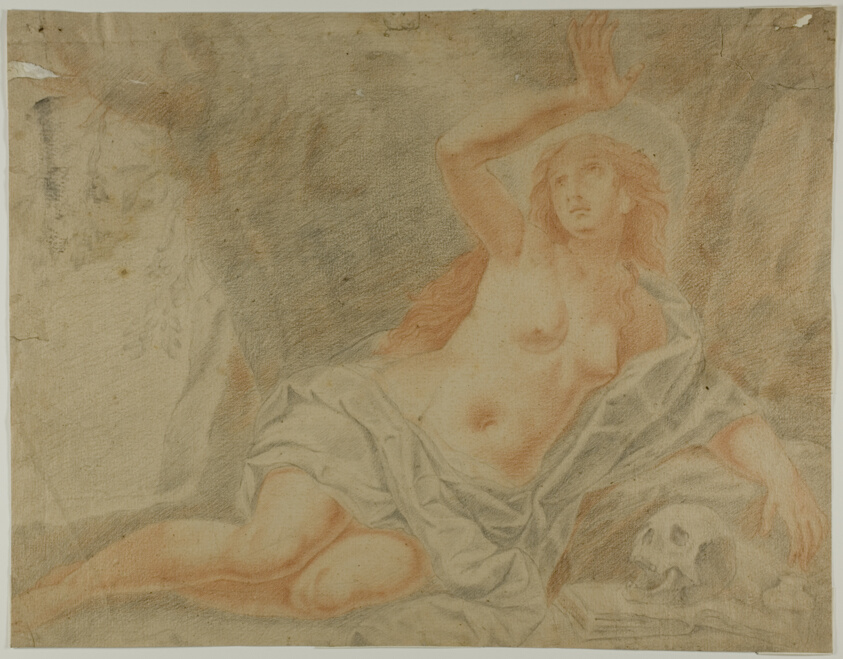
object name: Drawing and Watercolor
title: Mary Magdalene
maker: Claude Mellan, after; French, 1598-1688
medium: Red and black chalk on cream laid paper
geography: France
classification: drawings (visual works); prints and drawing